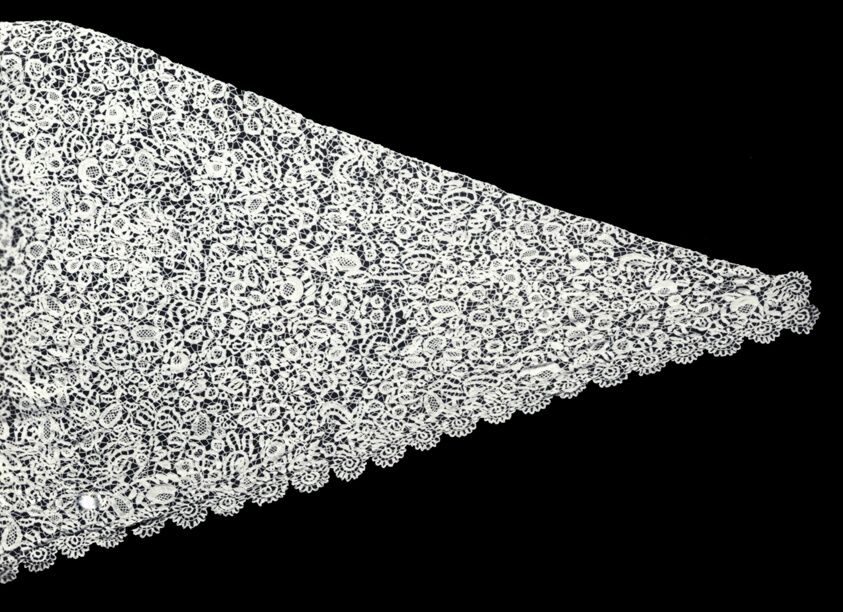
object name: Textile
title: Half Shawl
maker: England, Honiton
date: 1850s/60s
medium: Cotton, bobbin part lace of a type known as "Honiton" with clothwork tape and plaited bar ground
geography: England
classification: textile; lace - bobbin